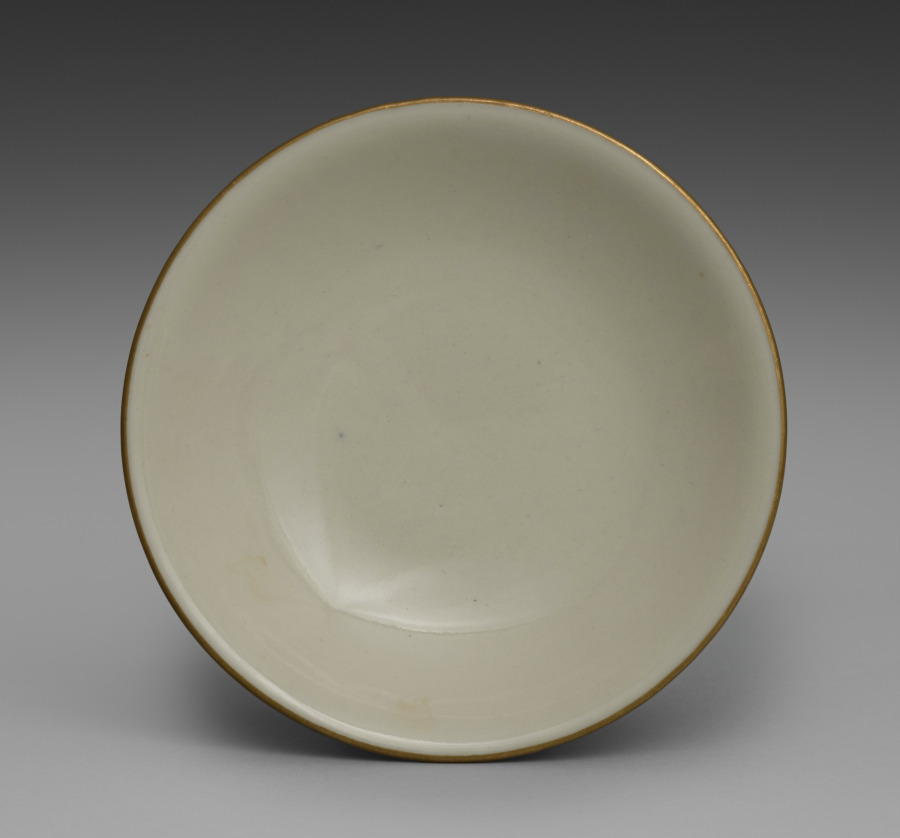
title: Cover for a Bowl from Dining Set with Plum Blossoms and Cracked-Ice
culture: Japan, Meiji period (1868–1912)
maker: Seifū Yohei II (Japanese, 1844–1878)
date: c. 1875–78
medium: Porcelain with molded designs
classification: Ceramic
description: Each item in this set has a delicate low-relief design of flowering plum branches over scattered, intersecting lines meant to resemble the cracked-ice surface of a frozen body of water and is signed on the base in gold pigment. While Yohei II produced many fine works in underglaze blue, like those produced by Kiyomizu Shichibei, he also made works in quite different styles later in his career, from the early 1870 s. In 1873, he was appointed purveyor to the Industrial Center of Kyoto Prefecture, a designation associated with Kyoto’s efforts to reach an international market through the port of Kobe; and from 1875 until his death, he was involved in national-level projects to present Japanese ceramics across the world. It was during this period that Yohei III was apprenticed to Yohei II, and it has been suggested that this set may in fact be an early example of Yohei III’s work, which he signed with his teacher’s name. Decorated with flowers resembling Japanese textile motifs, the set calls to mind the design of Yohei II’s pair of vases with plum blossoms in the Victoria and Albert Museum. Here, the elaborate trees created for a formal public exhibition setting have been translated into the approachable blossoms of the genteel domestic environment. While the designs are consistent across the pieces, each raised flower petal and pistil and each incised line in the ice was done by hand, so the cups, bowls, and dishes are similar yet unique. The bottoms of two boxes once identified the set’s owner, but the information has been deliberately obscured with black ink. However, inscriptions still visible appear to indicate two occasions, once at the end of July 1886 , and once again in June 1916 , when parts of the set were requested from Hokura in Niigata Prefecture. The location corresponds to a neighborhood in the present-day city of Jōetsu. The surname Tsuji 辻 also appears on a paper tag affixed to one of the box cloths. Future research may possibly reveal more about their provenance. A vase by Yohei III in a private collection combines the formal grandeur of the Yohei II vases in the Victoria and Albert Museum with the gentler design of this dining set, placing flowering plum trees against soft, scalloped-edge clouds resembling those in golden screens.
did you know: The dining wares have a creamy white coloration that the four boxes containing them identify as Korean in style.